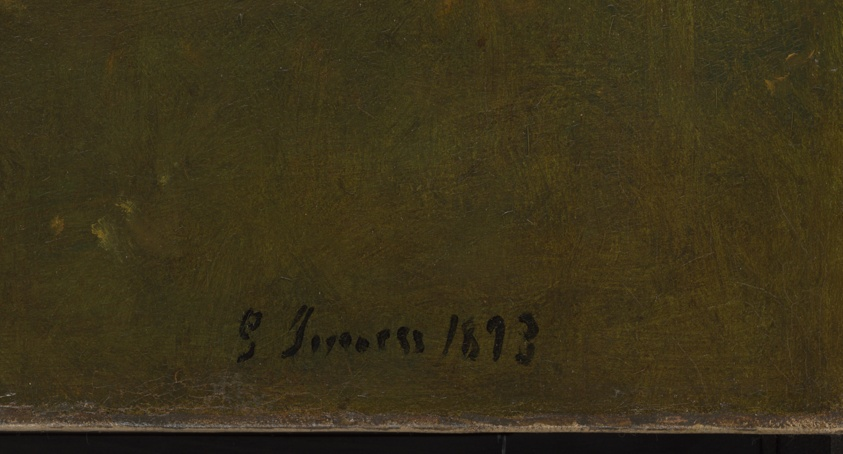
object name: Painting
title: Sunlit Valley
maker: George Inness (American, 1825–1894)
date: 1893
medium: Oil on canvas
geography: United States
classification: painting; american arts